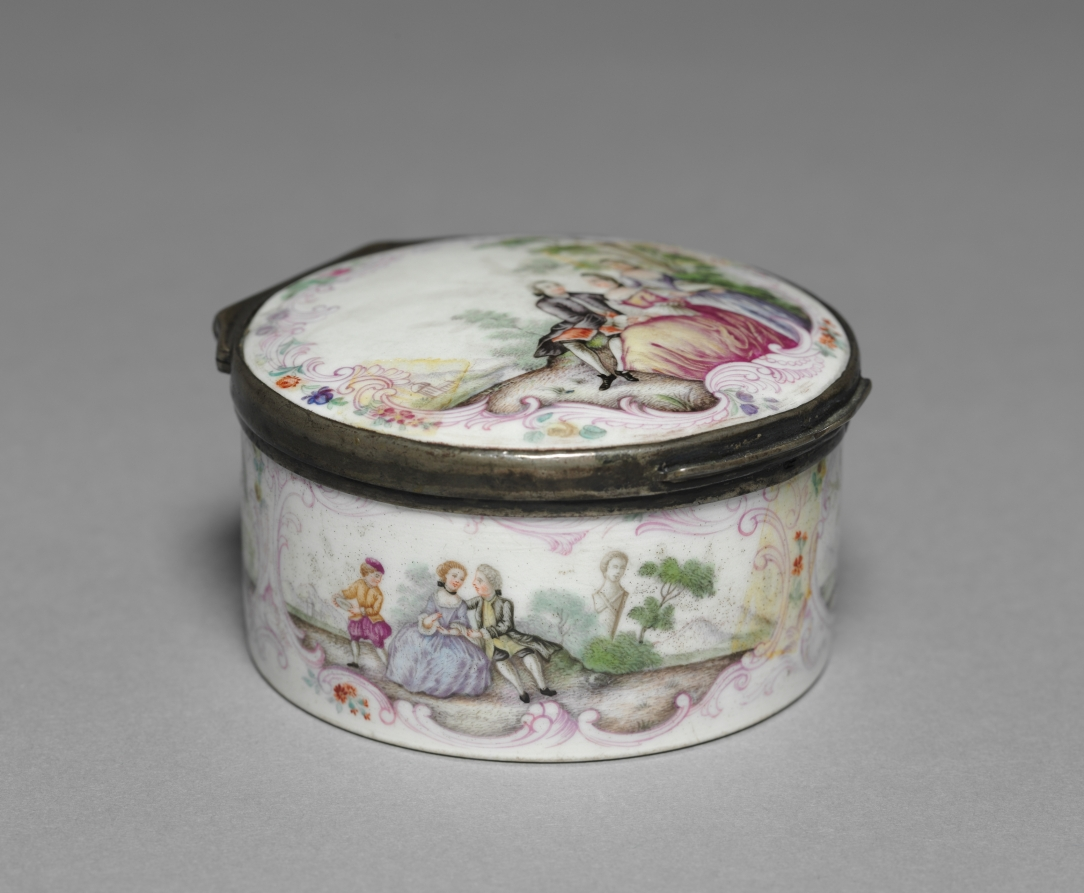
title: Box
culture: Austria, Vienna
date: 1788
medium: porcelain mounted in silver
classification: Miscellaneous